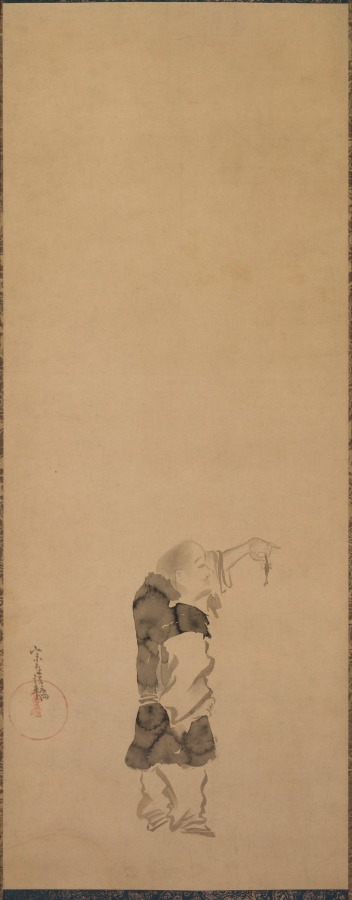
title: Kenshu, Monk with Shrimp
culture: Japan, Edo period (1615–1868)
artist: studio of Tawaraya Sōtatsu (Japanese, c. 1570–c. 1640)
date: c. 1600–1640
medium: hanging scroll; ink on paper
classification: Painting